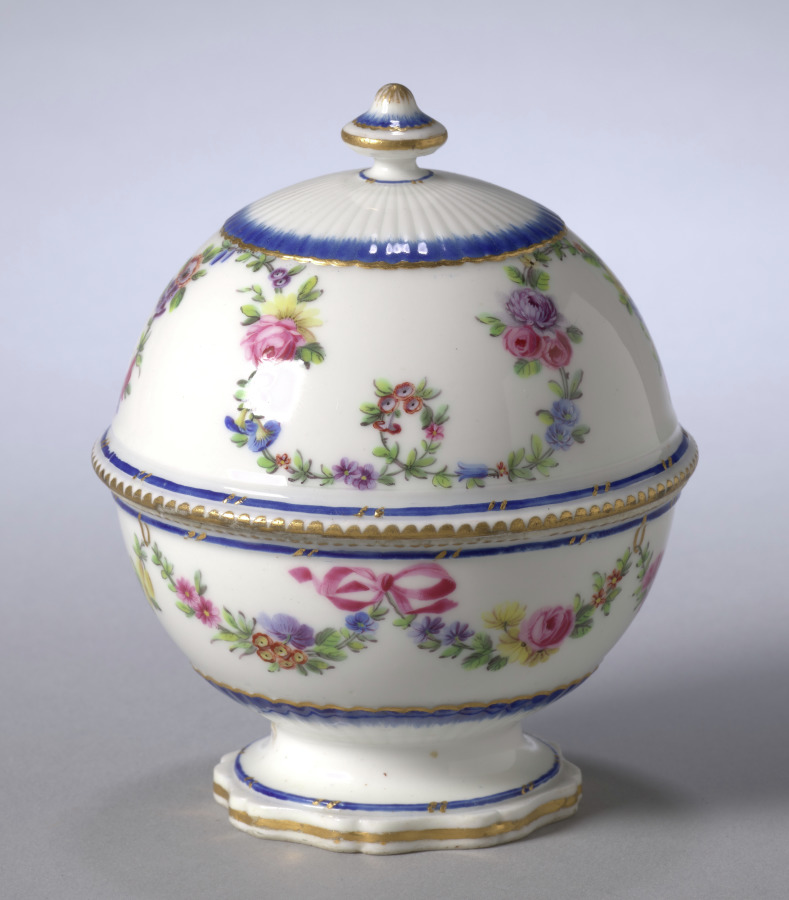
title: Soap Box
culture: France, Sèvres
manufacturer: Sèvres Porcelain Factory (French, est. 1756)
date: c. 1769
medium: soft-paste porcelain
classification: Ceramic